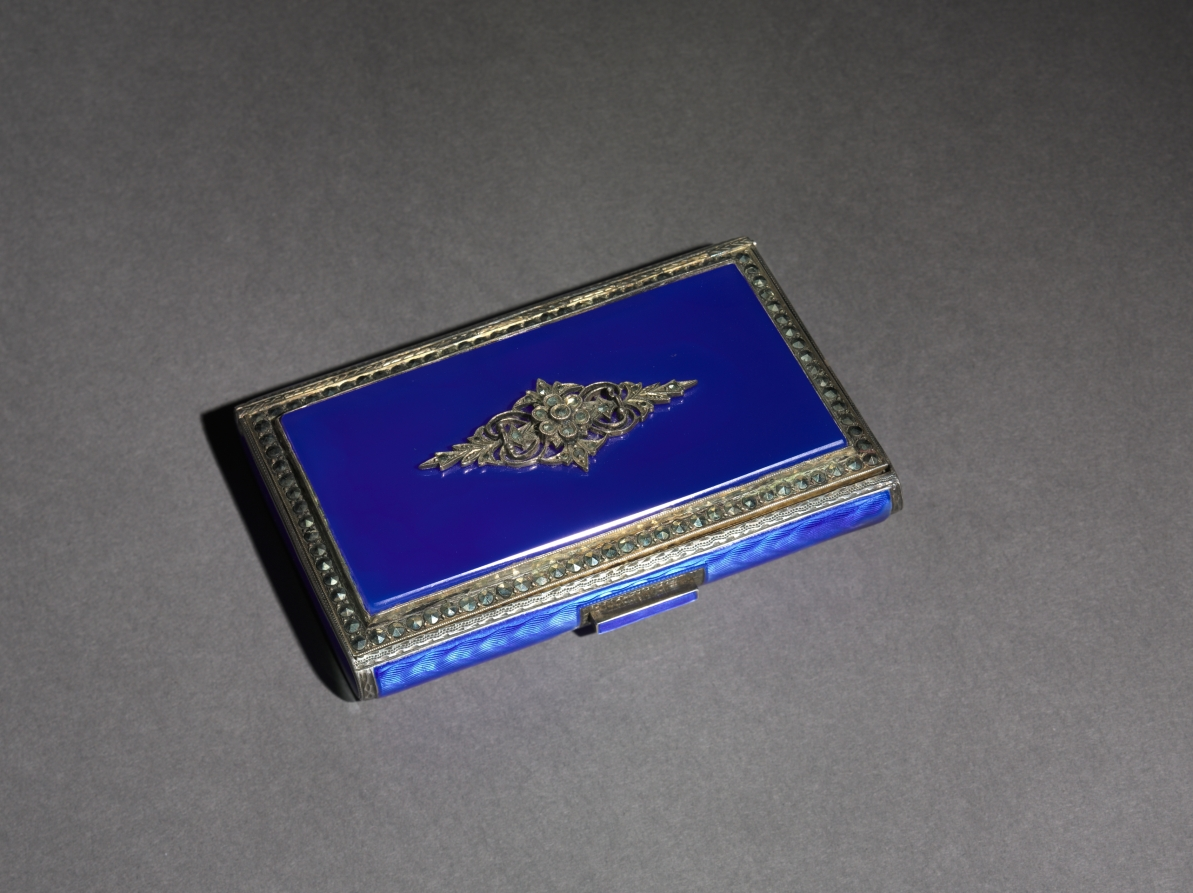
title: Cigarette Case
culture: possibly German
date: c. 1840–50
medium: enamel, cut steel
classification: Enamel